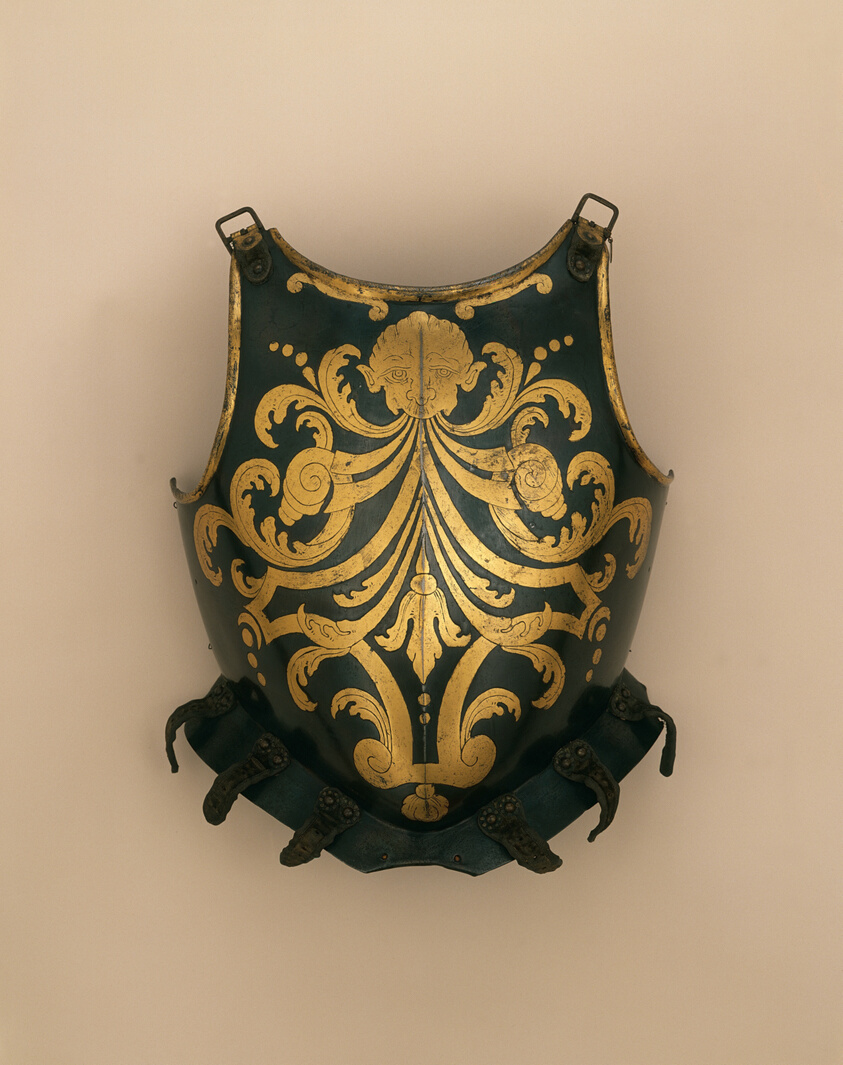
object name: Armor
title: Cuirass and Pauldrons for a Papal Swiss Guard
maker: Italian, Brescia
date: 1590; decoration 1623/44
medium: Steel, gilding, brass, copper, leather, and velvet textile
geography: Brescia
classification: suit; armor; arms and armor